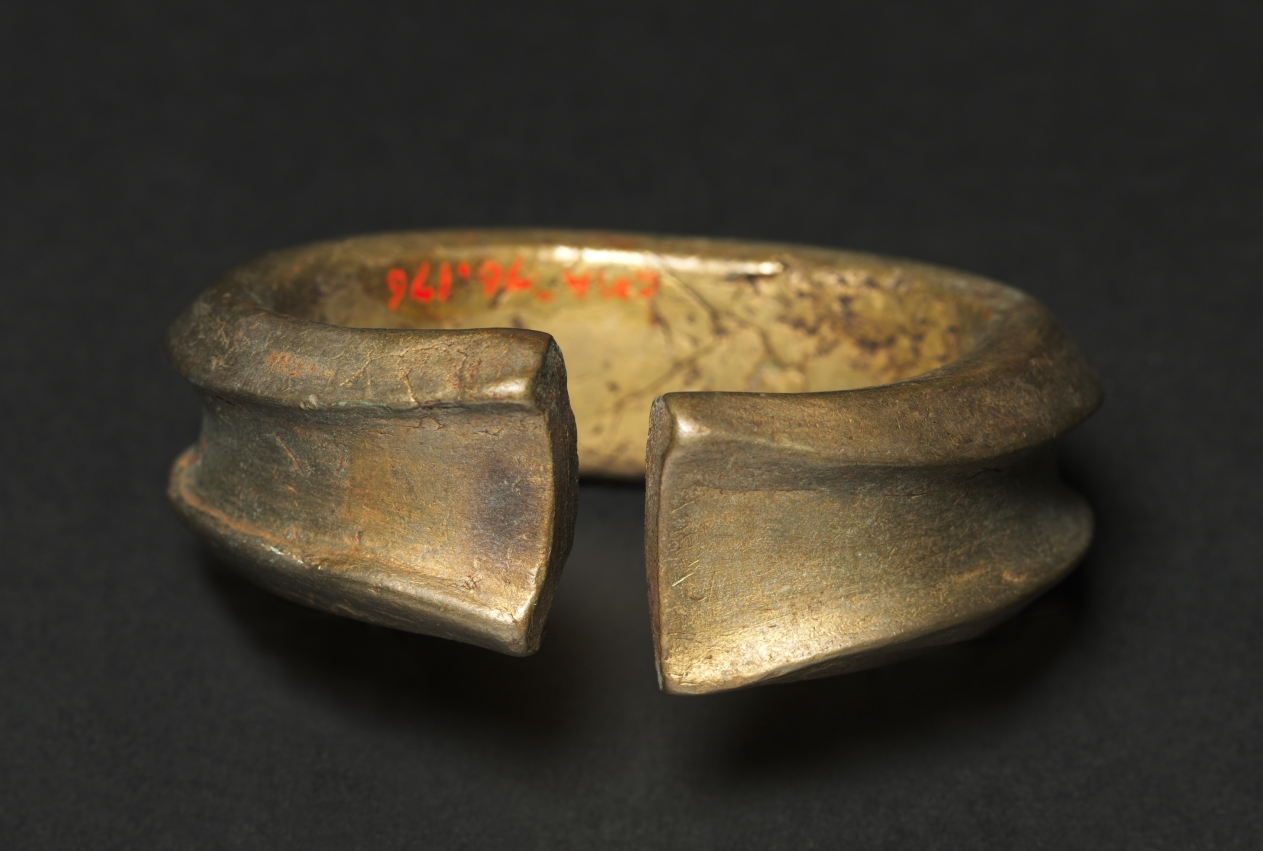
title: Bracelet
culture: Equatorial Africa, Gabon, Fang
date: 1900s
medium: Copper alloy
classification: Jewelry